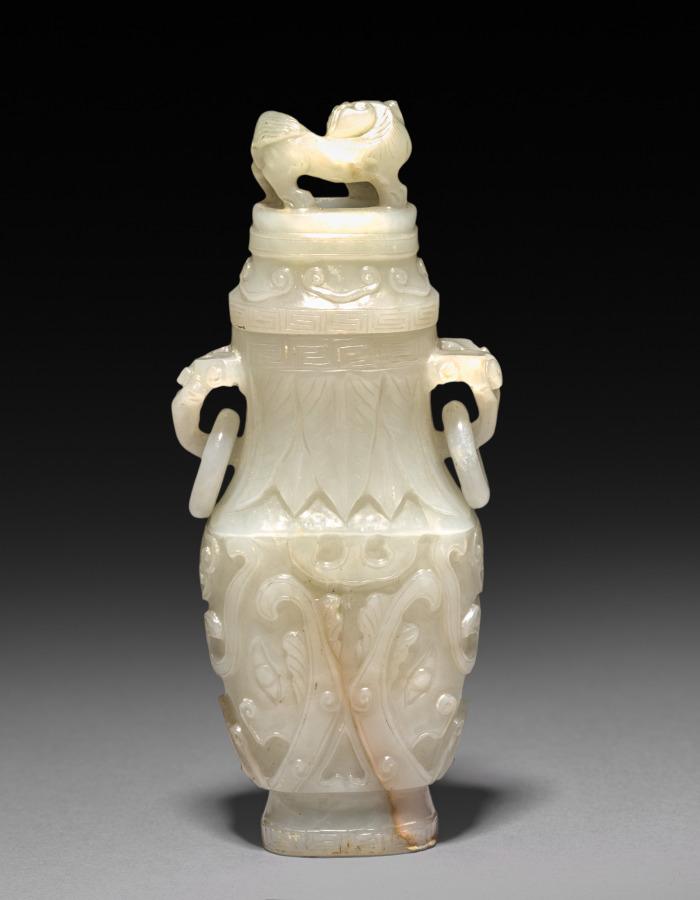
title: Jar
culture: China, Qing dynasty (1644-1911)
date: 1644–1911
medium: jade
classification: Jade